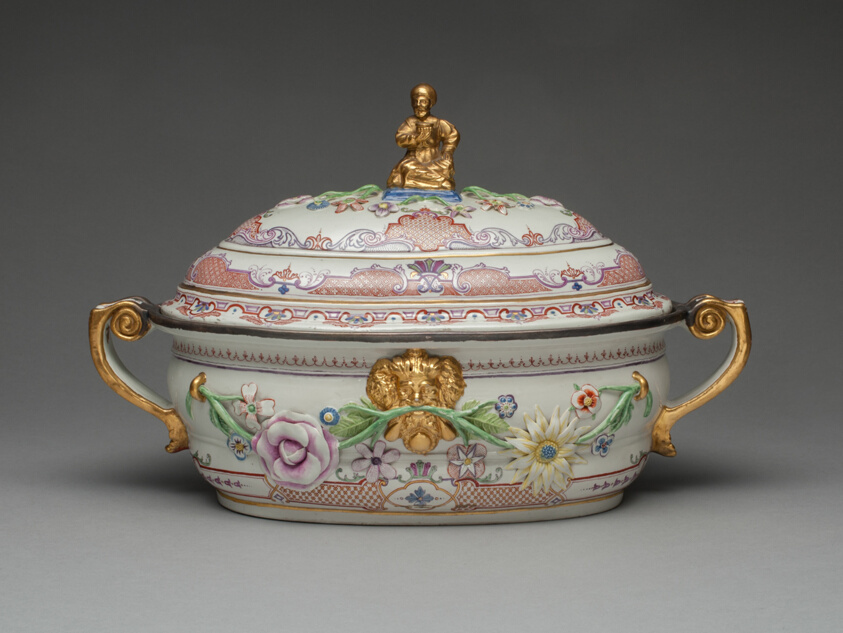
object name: Ceramics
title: Oval Tureen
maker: Du Paquier Porcelain Manufactory (Austrian, 1718-1744)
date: 1730–35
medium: Hard-paste porcelain, polychrome enamels, silvered and gilt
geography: Vienna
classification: porcelain; ceramics; european decorative arts